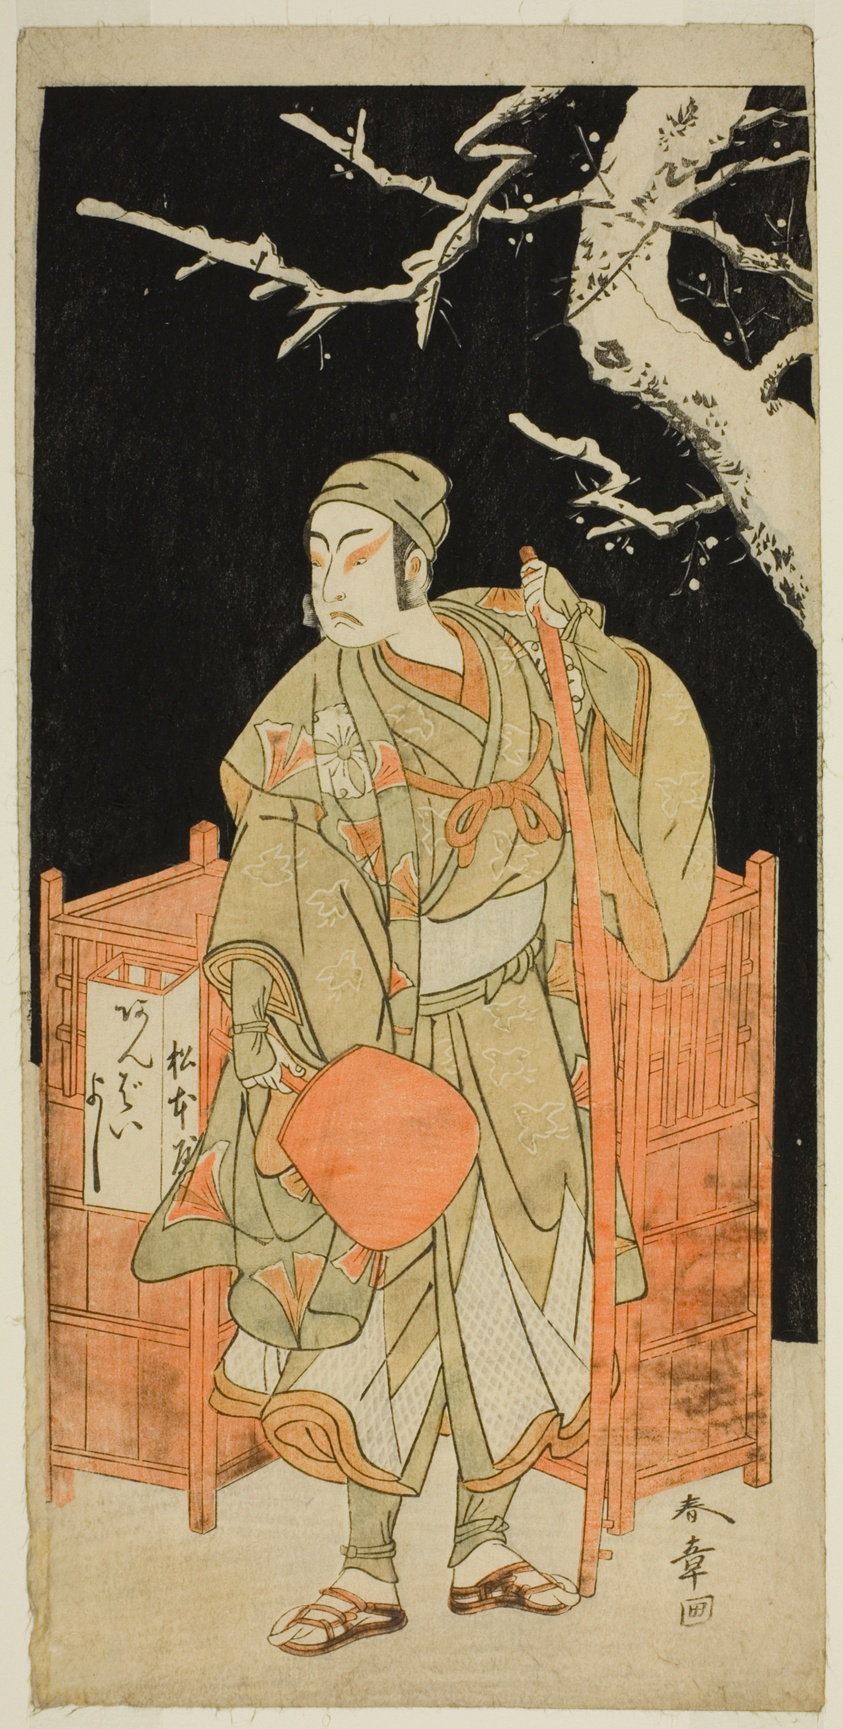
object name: Print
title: The Actor Matsumoto Koshiro IV as Sagami Jiro Disguised as Ambaiyoshi Gorohachi in the Play Oyoroi Ebido Shinozuka, Performed at the Nakamura Theater in the Eleventh Month, 1772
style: Japanese (culture or style)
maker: Katsukawa Shunsho 勝川 春章; Japanese, 1726-1792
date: c. 1772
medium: Color woodblock print; hosoban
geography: Japan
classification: woodblock print; print; asian art